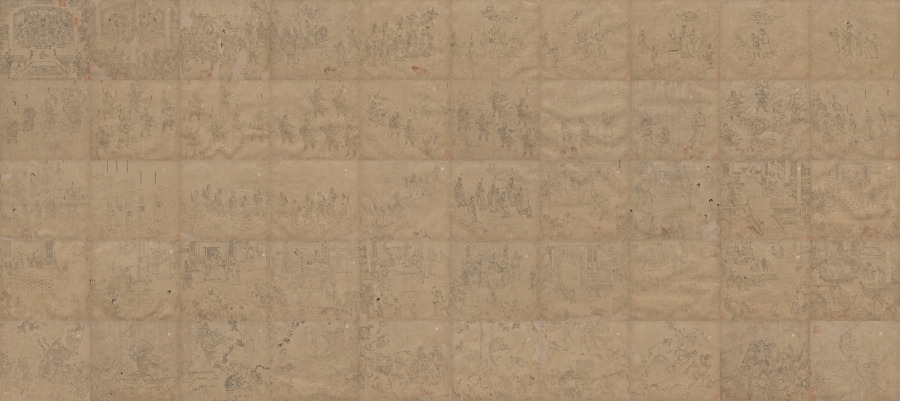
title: Album of Daoist and Buddhist Themes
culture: China, Southern Song dynasty (1127-1279)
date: 1200s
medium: Album of fifty leaves; ink on paper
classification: Painting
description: This extraordinary album has 50 paintings on a variety of religious subjects. They were likely created by several master craftsmen to share with studio apprentices as models for fulfilling commissions. The Jade Emperor and the Daoist pantheon make up the first 26 leaves. The next 14 leaves portray the Buddhist Ten Kings of Hell administering punishments to the dead. The third section, called “Clearing the Mountains,” features divine soldiers, led presumably by the deity Erlang Shen 二郎神, fighting undesirable creatures.